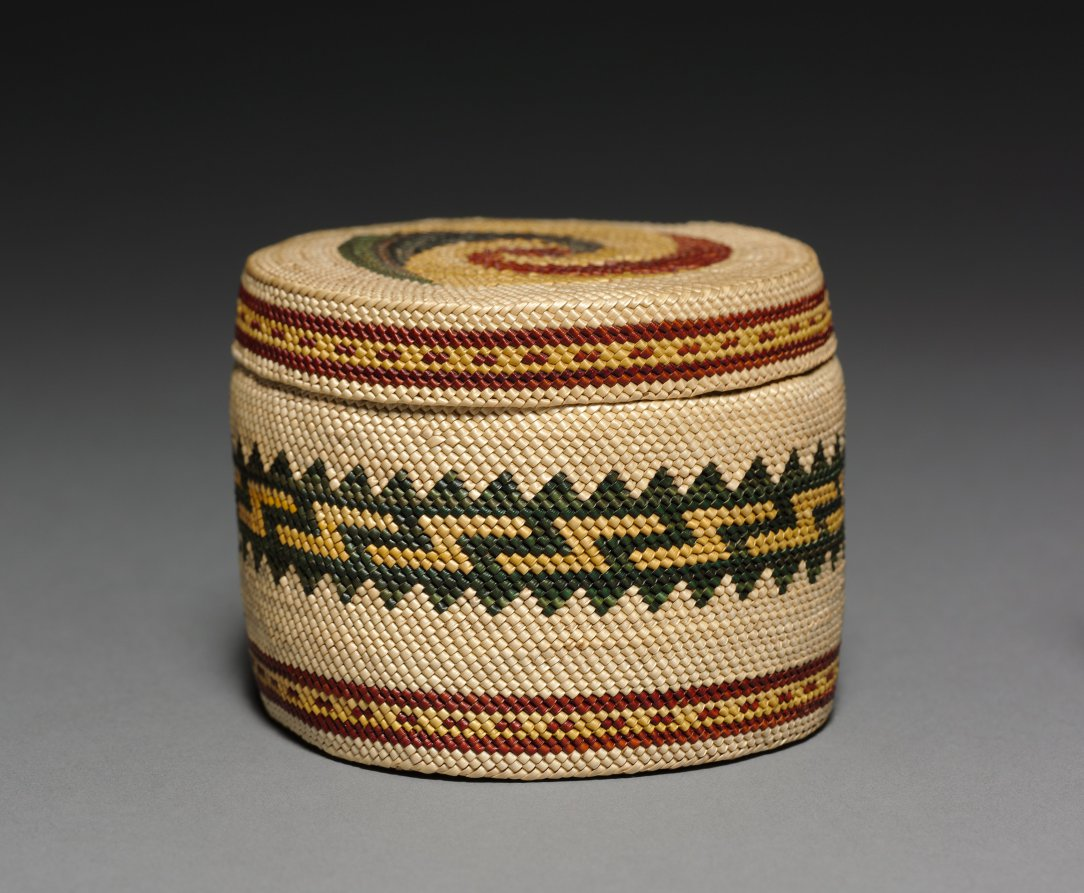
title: Covered Bowl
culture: Northwest Coast, Makah, late 19th-early 20th century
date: c. 1875–1925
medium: twined grasses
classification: Basketry